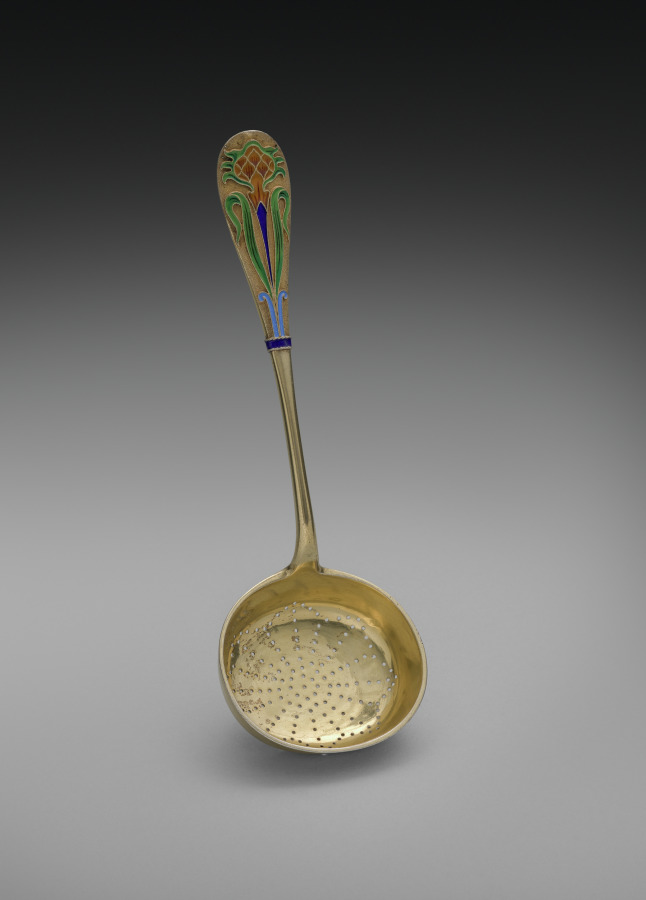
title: Tea Strainer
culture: Russia, St. Petersburg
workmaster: attributed to Feodor Ivanovich Rückert (Russian, 1840–1917)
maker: House of Fabergé (Russian, 1842–1918)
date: 1887–96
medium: silver gilt, opaque cloisonné enamel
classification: Miscellaneous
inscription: 84, St. George? [assay mark for Moscow, 1882-1896]; C. Fabergé (in Cyrillic); double-headed eagle [imperial warrant]; 11494 scratched.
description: Fabergé’s craftsmen in Moscow, especially under the watchful eye of workmaster Feodor Rückert, became known for their work in the pan-Slavic or neo-Russian style, hearkening back to 17th-century motifs of Russian folk art. Often on rather conventional shapes, Rückert and his silversmiths created an explosion of color, achieved through the historic technique of cloisonné enamel in which tiny metal lines are soldered to the surface then filled with glass powders in various colors and fired to create a high gloss finish. The result is a spectacular evocation of the 17th-century originals. Far from mere copies, however, Rückert's designs, such as this tea service, employ naturalistic or abstract motifs in a thoroughly modern adaptation of a remarkable earlier period of Russian art and decoration.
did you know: This tea strainer is part of a larger tea service.